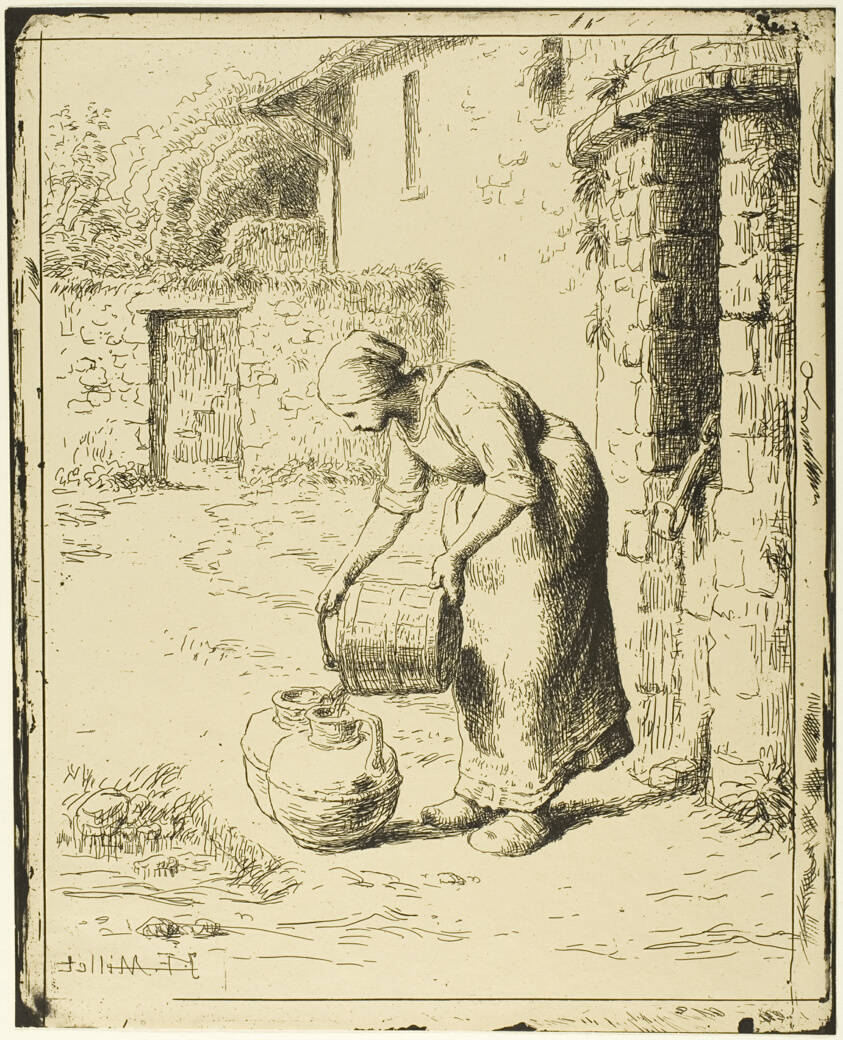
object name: Print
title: Woman Emptying a Pail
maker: Jean François Millet (French, 1814-1875); published by Sagot-Le Garrec and Company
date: 1862–63, published 1921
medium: Cliché-verre on photo-sensitized tan wove paper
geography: France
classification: cliché-verre; print; prints and drawing